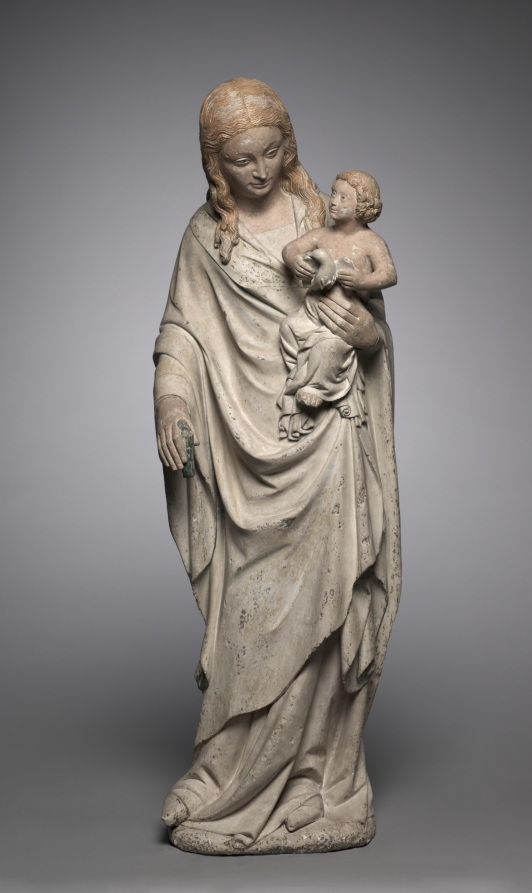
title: Virgin and Child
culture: France, Loire Valley, 14th century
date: c. 1385–90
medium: limestone with traces of polychromy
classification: Sculpture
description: The vibrant naturalism of the Virgin’s face and long flowing hair, as well as the deep, rich folds of drapery are characteristic of the work of itinerant artists from the Netherlands who found employment at the Valois courts of France at Paris, Berry, and Burgundy. Their native styles and attention to realistic detail fused with native French artistic traditions toward the end of the 14th century and took root. The original source of this Virgin and Child is unknown, but its style suggests a relationship with similar sculptures made for churches and abbeys of the Central Loire Valley. The additional influence of the style of the sculptor André Beauneveu has also been noted for this sculpture. His commissions were abundant and his influence widespread. The sculptor of this work appears to have had some knowledge of Beauneveu’s work in the Loire region.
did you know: This sculpture was painted over many times over its history, common for medieval sculpture.